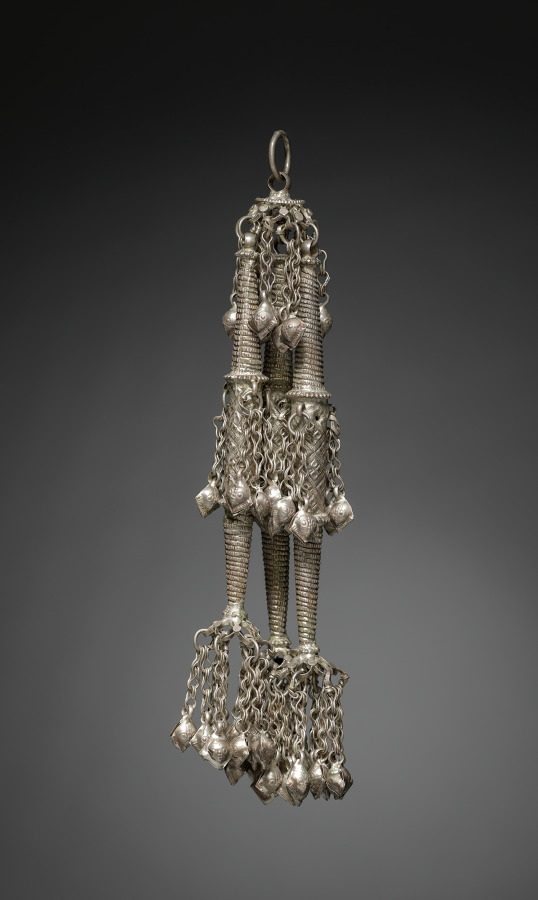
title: Hair pendant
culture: India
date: 1800s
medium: silver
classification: Jewelry